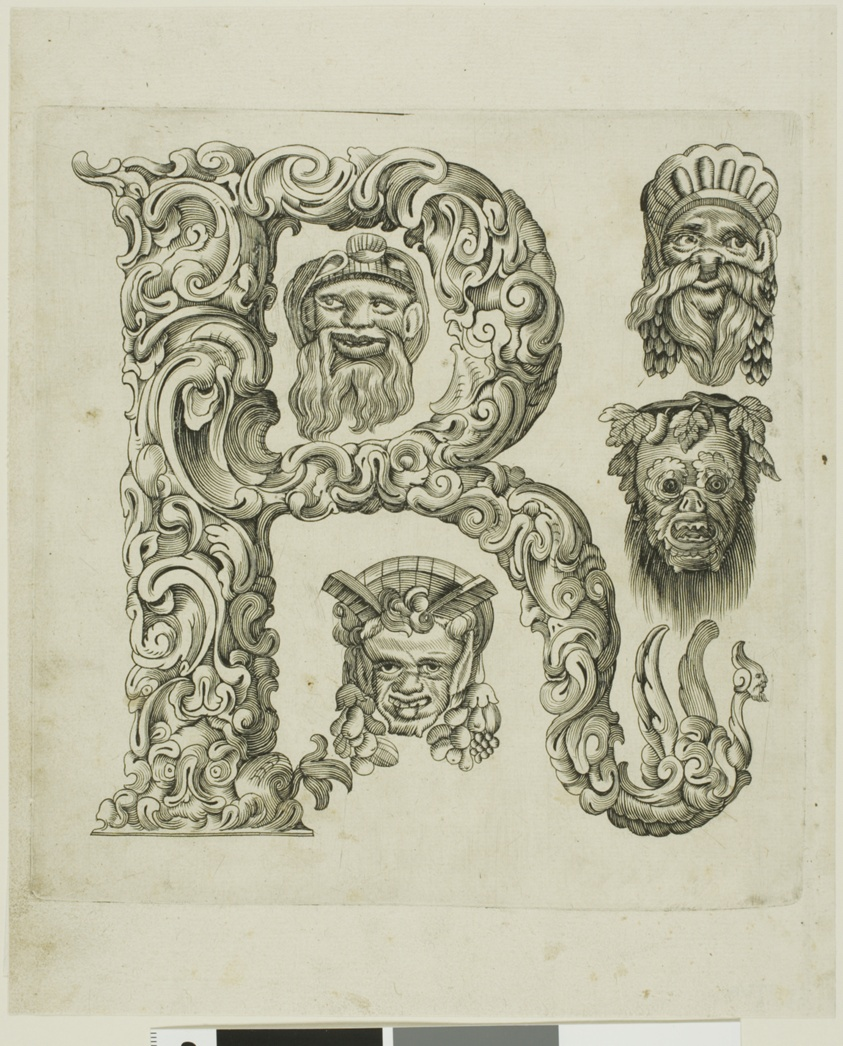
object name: Print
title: Letter R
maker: Peter Aubry (German, 1596-1668)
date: 1630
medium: Engraving on paper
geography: Germany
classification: engraving; print; prints and drawing